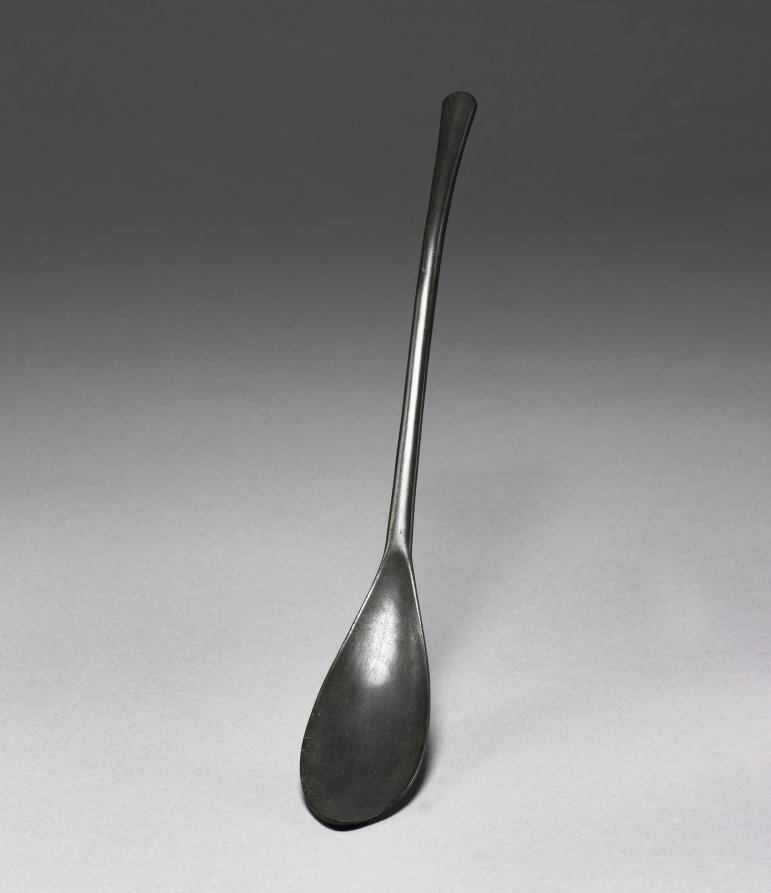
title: Spoon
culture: Korea, Goryeo dynasty (918–1392)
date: 918–1392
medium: silver bronze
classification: Metalwork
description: Celadons, spoons, seals, and bronze mirrors were the most common burial objects in tombs during the Goryeo period (918–1392). Furnishing tombs with an elaborate assemblage of objects was believed to honor and comfort the newly dead. Generally, Goryeo tombs were left untouched until the late 19th century. During the colonial period (1910–45), however, Japanese archaeologists hastily excavated the tombs located in Kaeseong, the former capital of the Goryeo period. Scholars recently have proposed that toward the end of the 14th century, Koreans enjoyed meat-based soups more than any other dishes, explaining why many more spoons than chopsticks were buried in tombs.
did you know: Bronze spoons are the most common burial item. Scholars have proposed that toward the end of the 14th century, Koreans enjoyed meat-based soups more than any other dishes, explaining why spoons became common household items as well as burial goods.